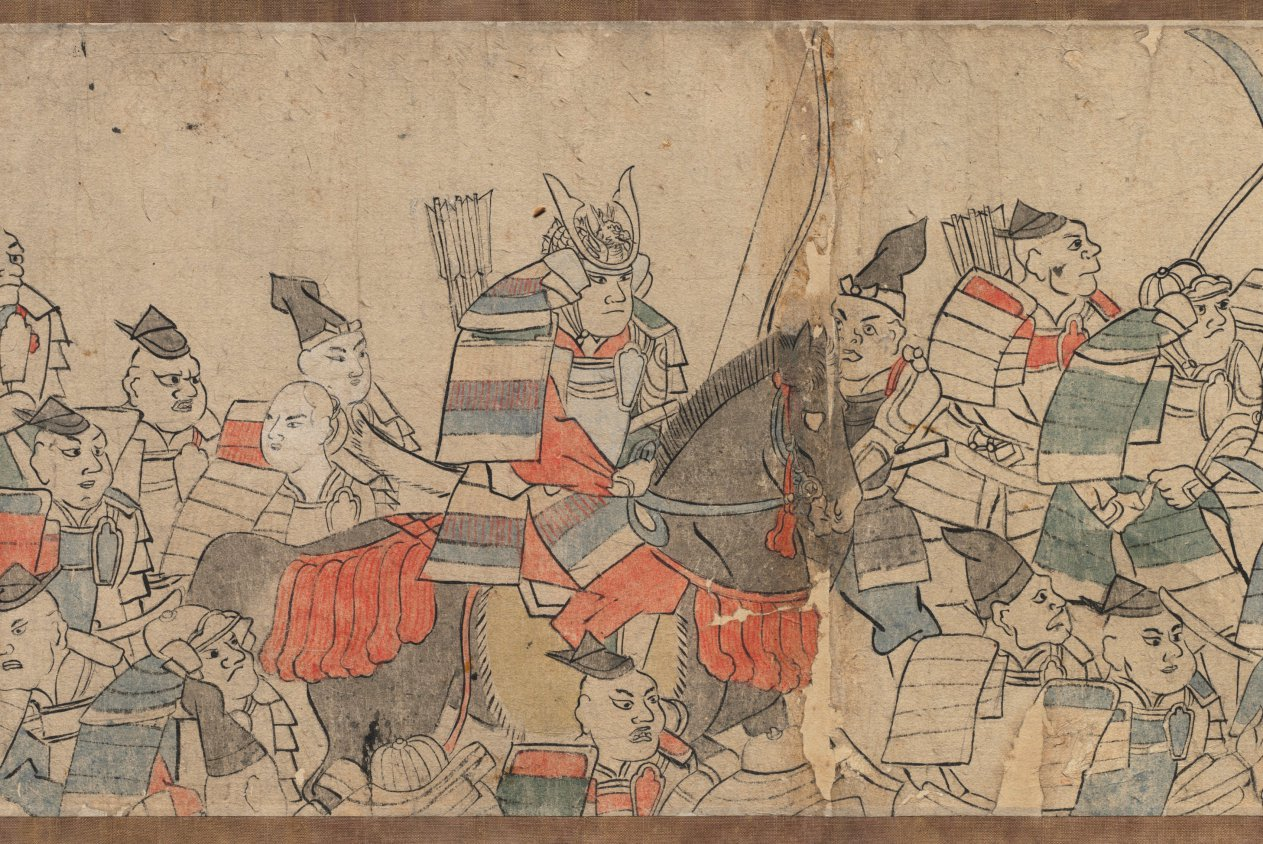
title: Oeyama Engi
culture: Japan, Edo period (1615–1868)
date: 1615–1868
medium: one of a pair of handscrolls; ink and color on paper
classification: Painting